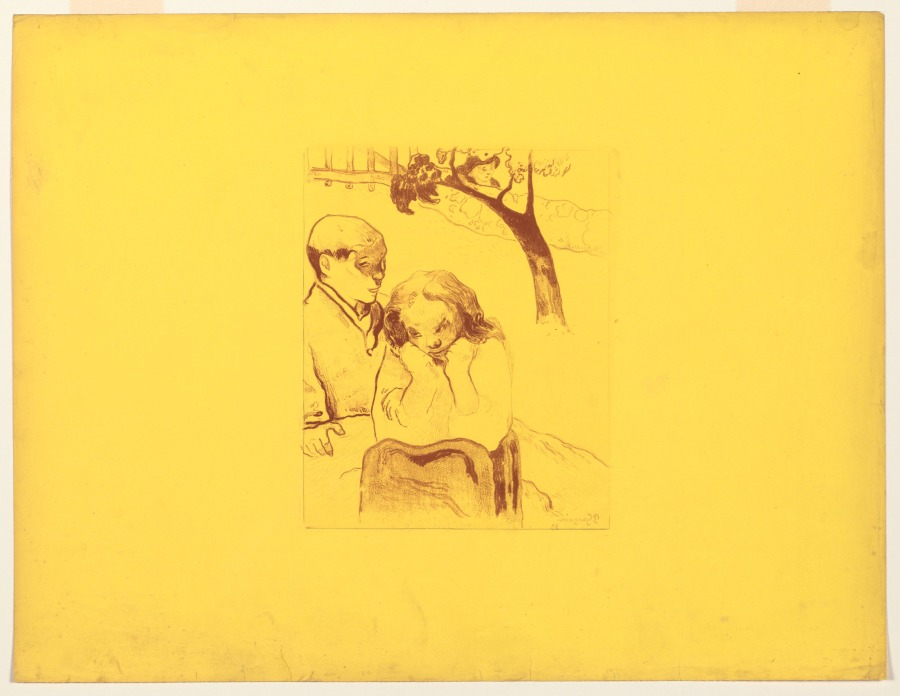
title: Volpini Suite: Human Misery (Misères Humaines)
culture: France, 19th century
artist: Paul Gauguin (French, 1848–1903)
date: 1889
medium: zincograph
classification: Print